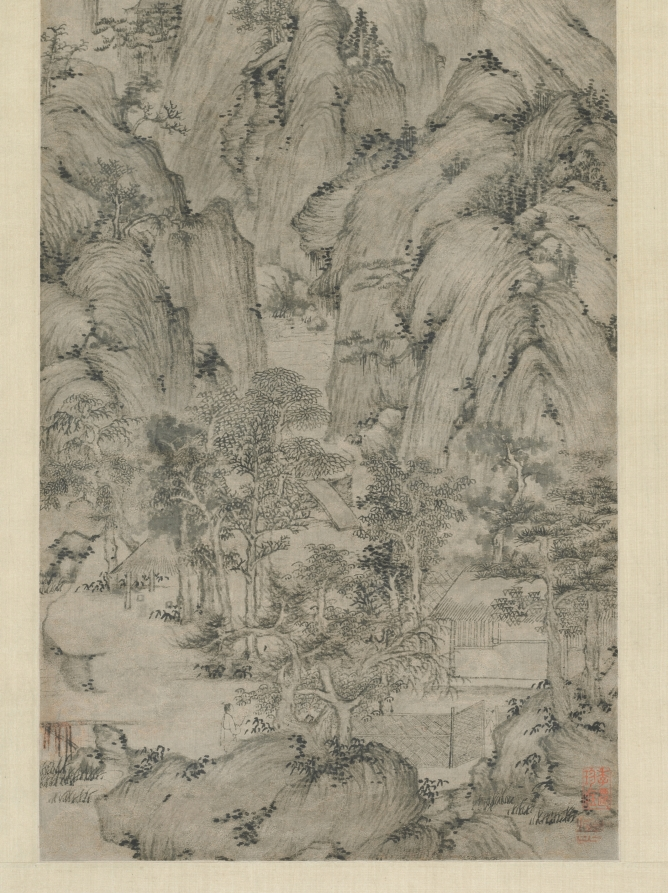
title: Streams and Mountains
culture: China, Yuan dynasty (1271-1368)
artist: Xu Ben (Chinese, 1335–1380)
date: 1372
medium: hanging scroll, ink on paper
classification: Painting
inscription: 綠樹黃鸝處處山， 偶從谿上看雲還。/ 人生未許全無事， 纔得登臨便是閑。 壬子七月十日徐賁為吉夫先生畫 並詩共上 [印] 幼文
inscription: Label on mounting probably by Liang Qingbiao 梁清標 (1620–1691).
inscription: 4 additional inscriptions and 9 additional seals: 1 poem of Xie Hui 謝徽 (c. 2nd half 14th c.); 1 poem and 1 seal of Gao Qi 高啟 (1336–1374); 1 poem and 1 seal of Lu Zhen 盧貞 (c. late 14th c.); 1 poem of Huang Zai 黃載; 3 seals of Liang Qingbiao 梁清標 (1620–1691); 1 seal of Wang Jiqian [C. C. Wang] 王季遷 (1907–2003); 3 seals unidentified.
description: Like many literati of the late Yuan and early Ming dynasties, Xu Ben was entangled with the perils of dynastic change as well as the ups and downs of his official career. It was mainly through the art of painting and poetry, as well as the ideal of reclusion, that he sought feelings of exhilaration and shared them with his friends. Xu created this monumental landscape during one of his periods of reclusion. His innumerable “hemp-fiber” texture strokes create a unifying rhythm among the towering mountains with tightly knit masses of rocks. Nestled among shady trees at the base of the mountain is a rustic retreat, which a scholar approaches on foot to visit with the hermit. Among the five inscriptions at the top of the painting is one by the artist himself. He dedicated the painting to someone named Jifu 吉夫 and recorded a poem in praise of mountains. Green trees, yellow orioles, everywhere are mountains; Aimlessly I return from the stream, where I watched the clouds. Man's life does not allow unbroken ease, But to be able to be high up in the mountain, this is leisure.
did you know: An attendant opens a reed gate to welcome the scholar with a walking stick approaching the rustic retreat.